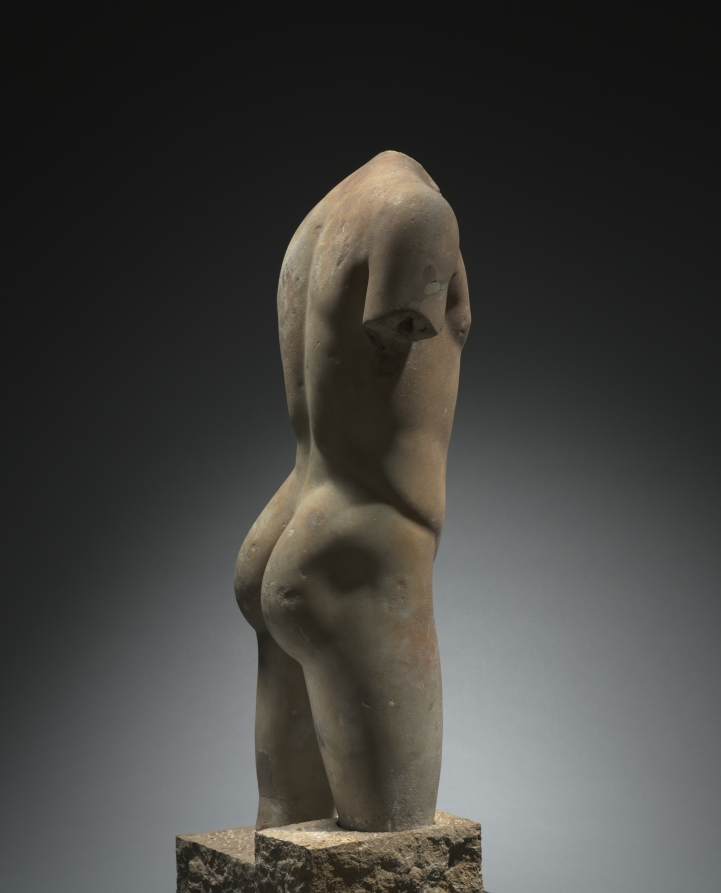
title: Torso of a Youth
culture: Greece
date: c. 150–100 BCE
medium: marble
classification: Sculpture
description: The exceptional workmanship suggests that this sculpture was carved by a Greek sculptor. Its incomplete state of preservation makes precise identification difficult, but it was most likely an Apollo or Dionysos, modeled in the soft, somewhat effeminate style of Praxiteles. The museum’s Apollo Sauroktonos is a useful parallel. The two drill holes in the upper chest are ancient and were possibly used to support separate long tresses of hair. The sculpture may well be a copy of a fourth-century original.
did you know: It was common practice in the 1700s and 1800s to attach new heads or limbs to fragmented ancient statues like this one.